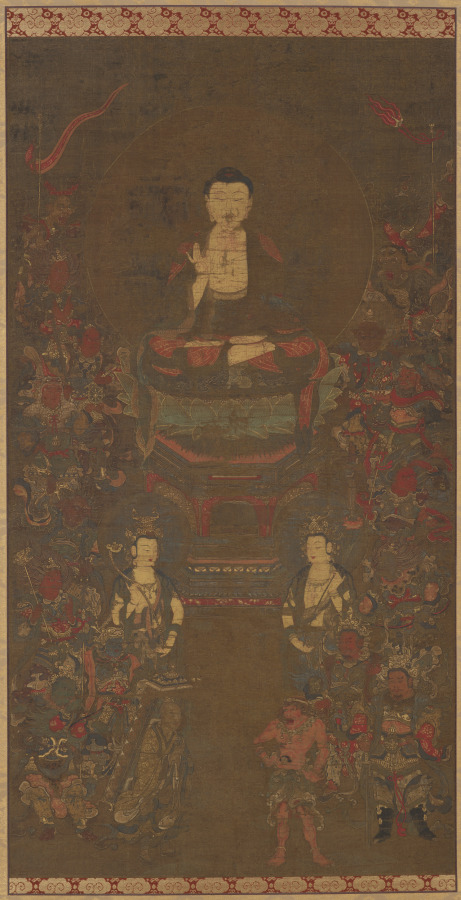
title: Shakyamuni with the Sixteen Benevolent Deities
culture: Japan, Nanbokuchō period (1336–92)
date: mid- to late 1300s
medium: Hanging scroll; ink, color, gold and cut gold on silk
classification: Painting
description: The historical Buddha Shakyamuni forms a triad with the bodhisattvas Fugen and Monju. Sixteen deities who protect the Buddhist scripture called the Great Perfection of Wisdom Sutra surround them. At the bottom left stands the Chinese monk Xuanzang, noted as a Buddhist scholar and translator of religious texts from India, including the Great Wisdom Sutra.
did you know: This painting would have been the main icon for ceremonial readings of the Great Perfection of Wisdom Sutra.